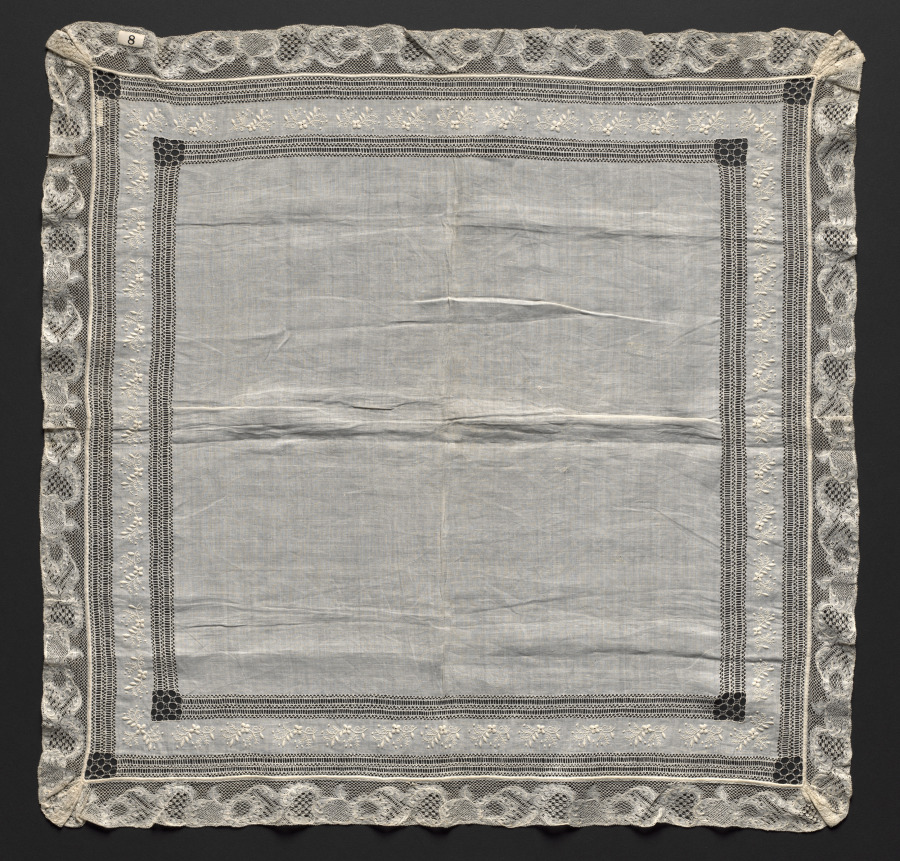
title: Lace Handkerchief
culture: Flanders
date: 1800s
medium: Plain weave linen center; machine-made lace edging with needle lace (drawnwork) and embroidery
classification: Embroidery